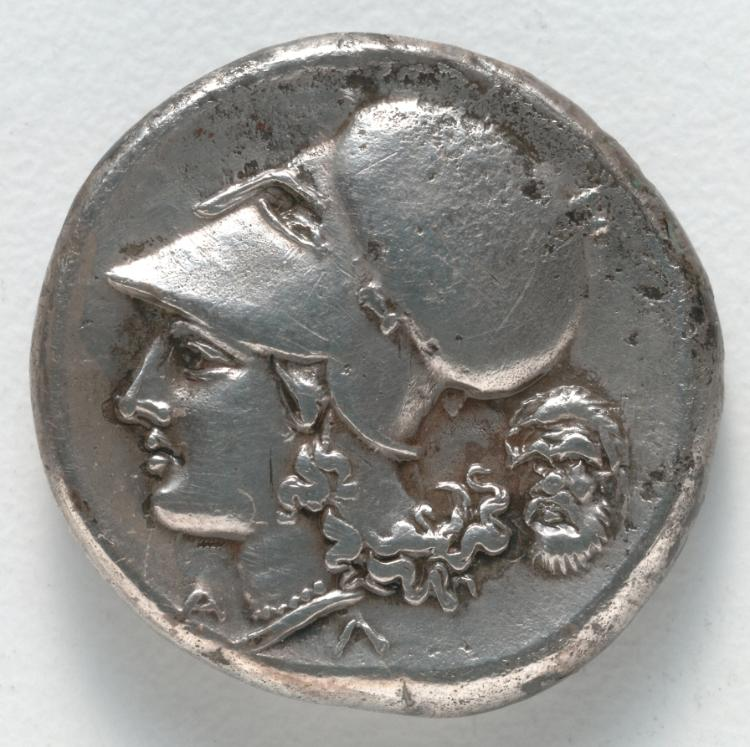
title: Stater: Head of Athena (reverse)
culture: Greece, Corinth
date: c. 350–338 BCE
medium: silver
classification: Coins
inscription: Α | Λ